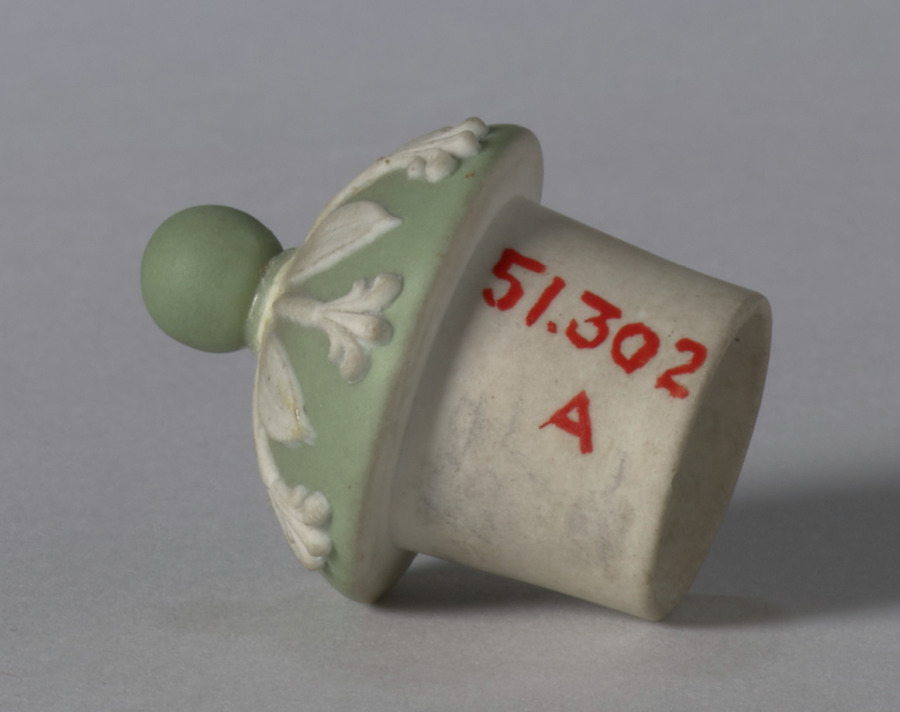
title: Cover for an Urn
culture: England, Staffordshire, late 18th-early 19th Century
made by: Wedgwood Factory (British)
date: c. 1800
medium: jasper ware with relief decoration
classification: Ceramic